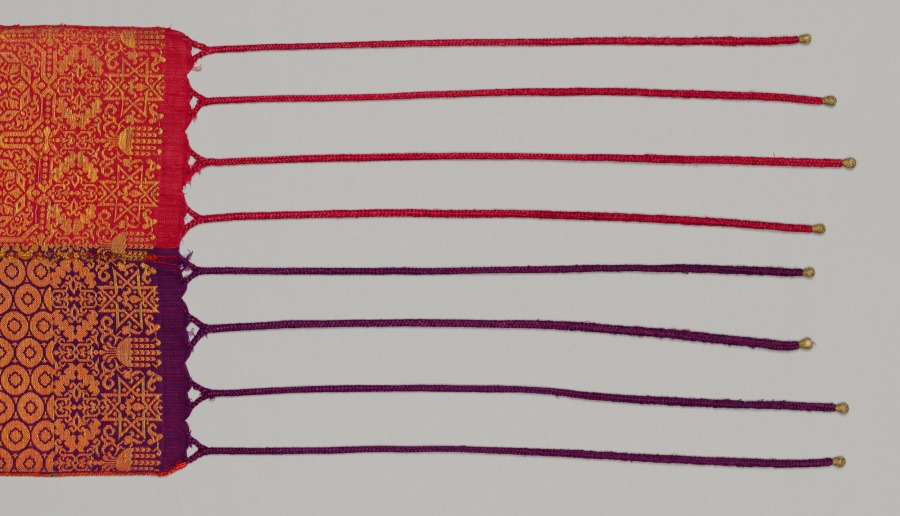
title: Belt (Hizam)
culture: Africa, North Africa, Morocco, Fes, Moroccan weaver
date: 1800s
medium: Silk, dye, metal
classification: Textile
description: Elaborate wedding sashes woven in Fez, Morocco, are distinctive for their multiple colors, designs, and uses. Folded lengthwise, they are wrapped around the waist so that the colors and designs coordinate with the attire worn during and after a wedding. Typically, the colors vary on each half although the designs are the same. Luxury textiles with elaborate patterns were woven on large looms called drawlooms that automatically repeated designs. The weaver operated the structure, inserting horizontal wefts, while the drawboy activated the programmed pattern. However, this wedding sash has ten programmed designs, which required considerable expertise.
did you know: Women sometimes added starch to stiffen these belts.